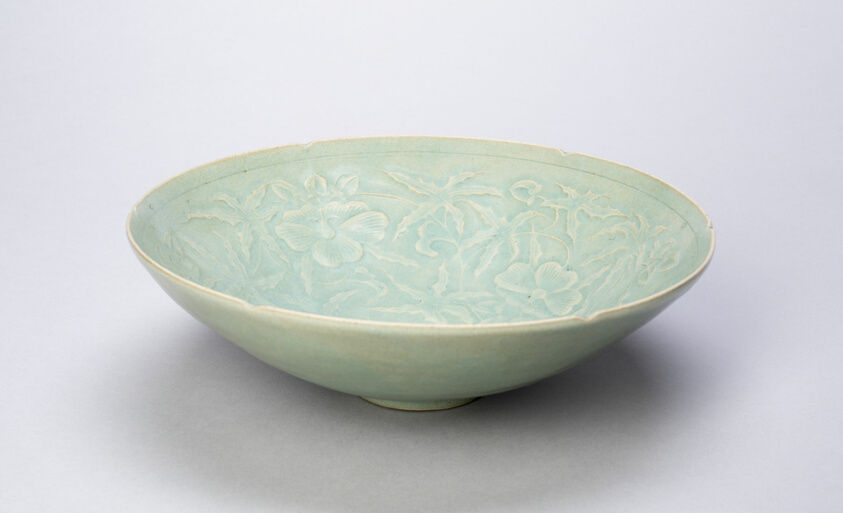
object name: Vessel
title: Lobed Bowl with Hibiscus Motif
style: Korean (culture or style)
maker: Korea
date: Goryeo dynasty (918–1392), 12th century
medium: Stoneware with celadon glaze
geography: South Korea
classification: bowl; dish (vessel); vessel